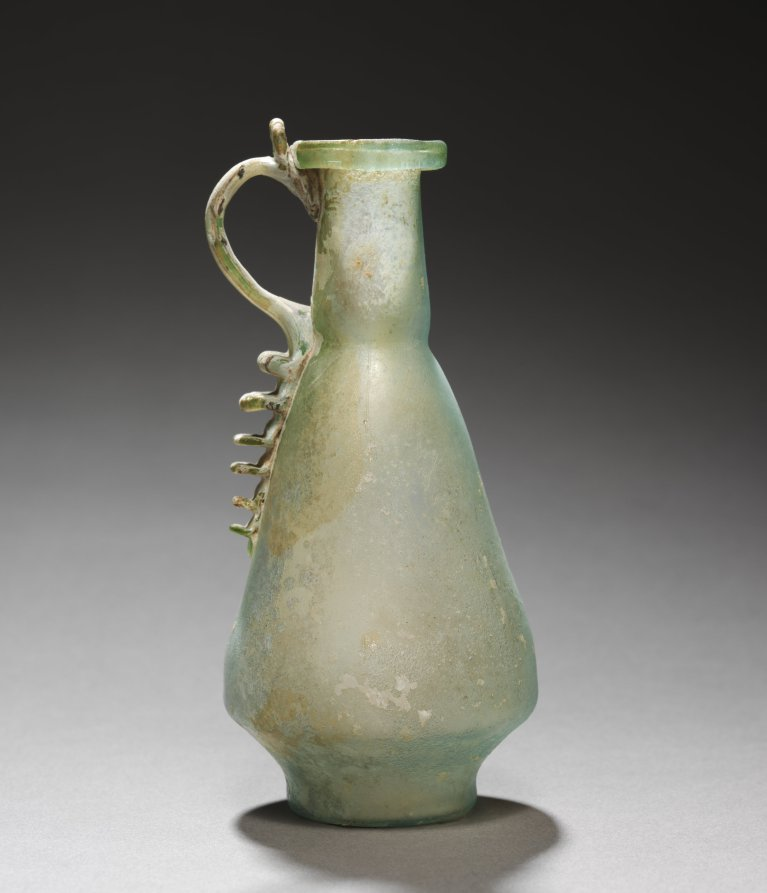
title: Jug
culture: Cyprus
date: 100–300 CE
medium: glass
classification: Glass